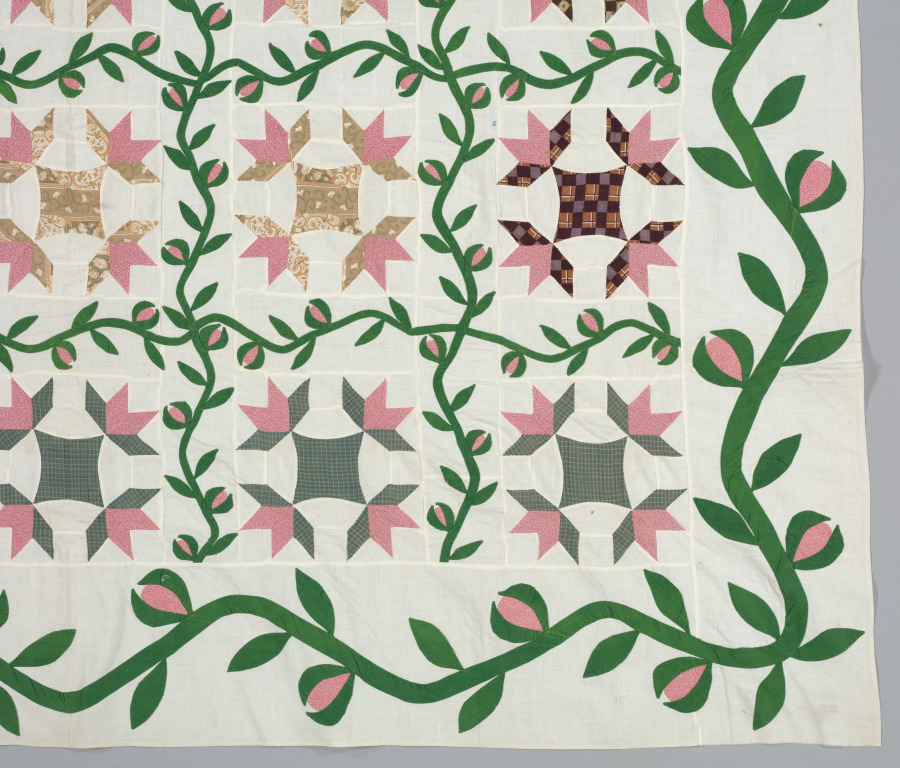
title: Quilt Cover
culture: America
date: c. 1857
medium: pieced cotton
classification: Textile